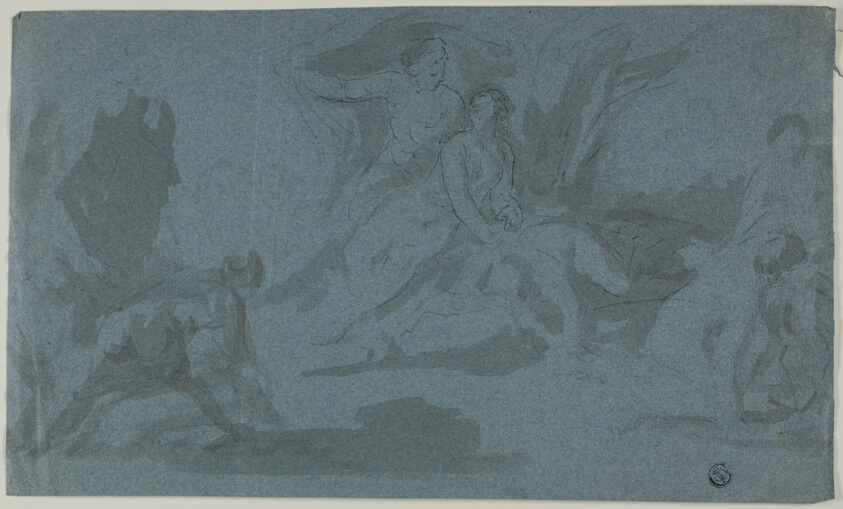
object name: Drawing and Watercolor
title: Mythological Scene with Woman Bathing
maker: Unknown Artist; French, n.d.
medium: Pen and black ink, with brush and gray wash and black chalk, on blue laid paper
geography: France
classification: ink or chalk wash; drawings (visual works); prints and drawing